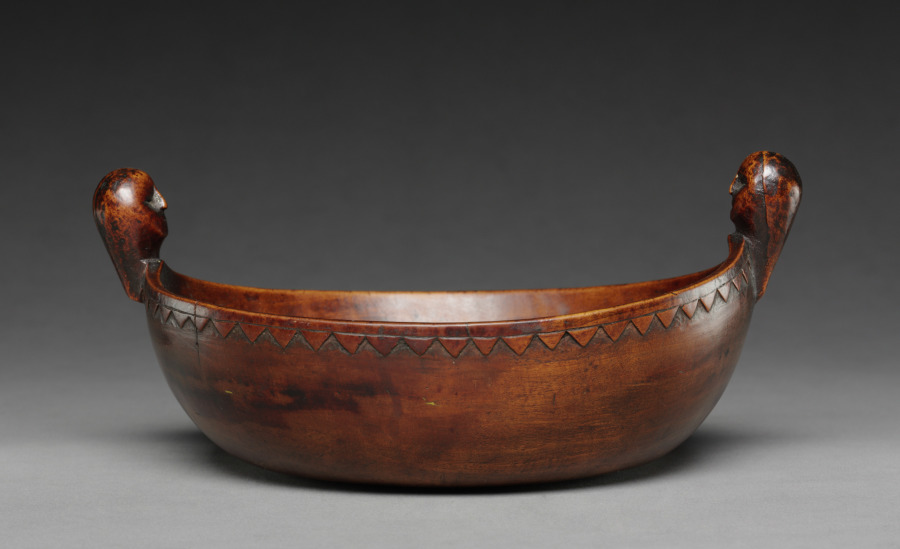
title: Bowl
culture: Native North America, Northeastern Woodlands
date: early 1800s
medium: wood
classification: Wood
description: Fine wooden bowls were often used during feasts in the Northeastern Woodlands. The heads on the rims may represent spirit beings, perhaps the owner’s guardian spirits, acquired through dreams or visions—thought to be the ultimate sources of truth. The medium may also be profoundly meaningful. A Great Lakes (Meskwaki) Native said in 1911, “The murmur of the trees when the wind passes through is but the voices of our grandparents. Often a whole forest hums with talk . . . we often hear the sound of their laughter and the sound of their lamentations.”